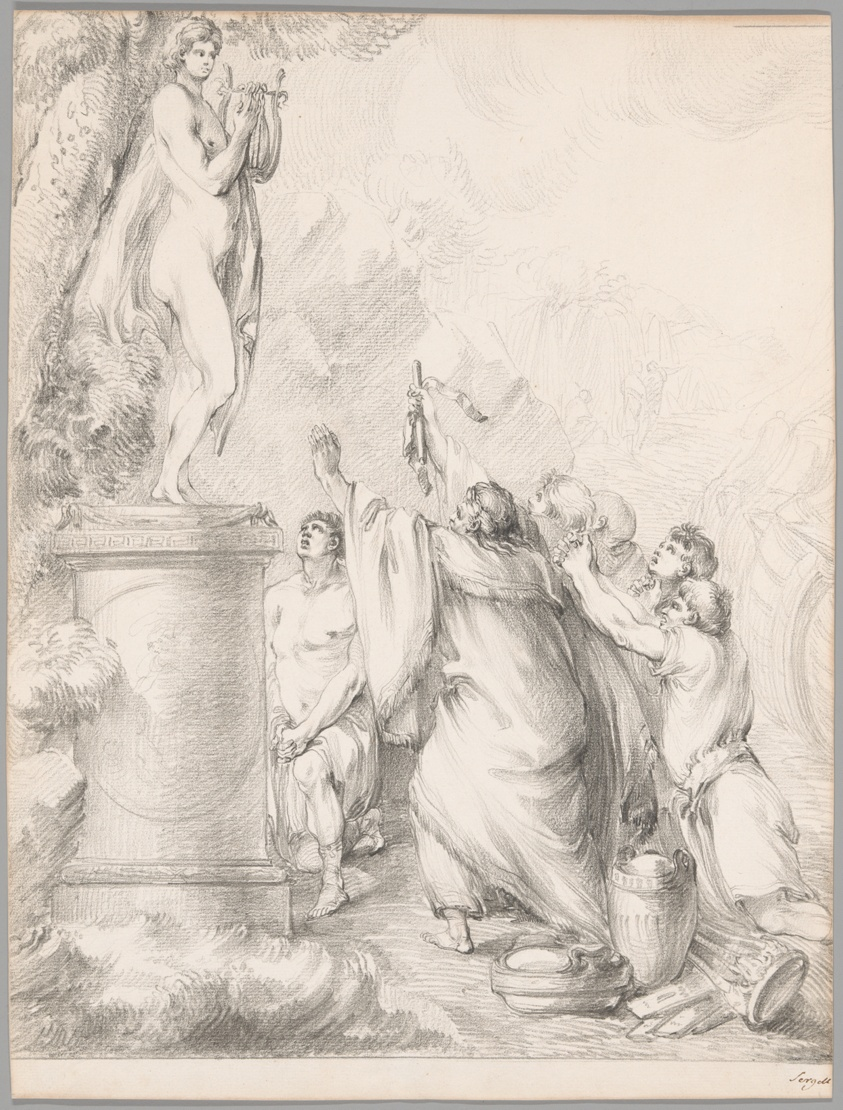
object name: Drawing and Watercolor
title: Chryses Imploring the Help of Apollo, from Iliad, Book I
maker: Johan Tobias Sergel (Swedish, 1740-1814)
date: 1765/66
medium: Black chalk on off-white laid paper, tipped onto wove paper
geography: Sweden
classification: drawings (visual works); paper; chalk; prints and drawing